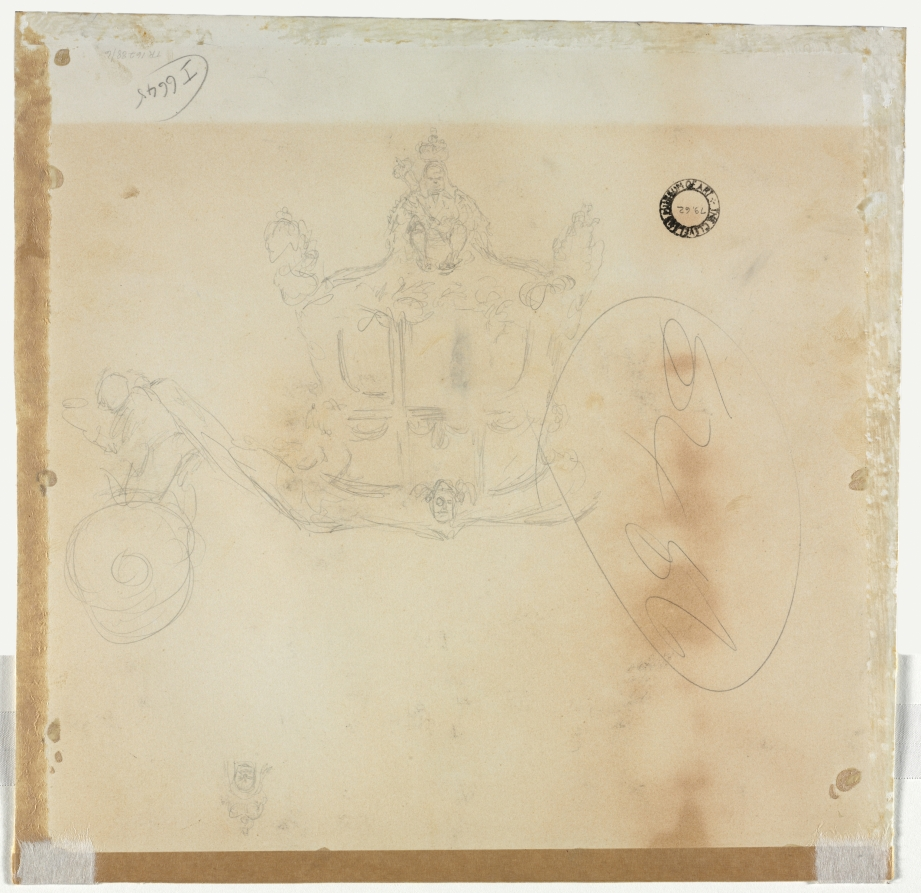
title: Study for Cab and Front Left Wheel of Coach and Study for Head of Crowned Figure Seated on Top of Coach (verso)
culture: England, late 19th-early 20th century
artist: Edward Tennyson Reed (British, 1860–1933)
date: c. 1889–1933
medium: graphite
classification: Drawing